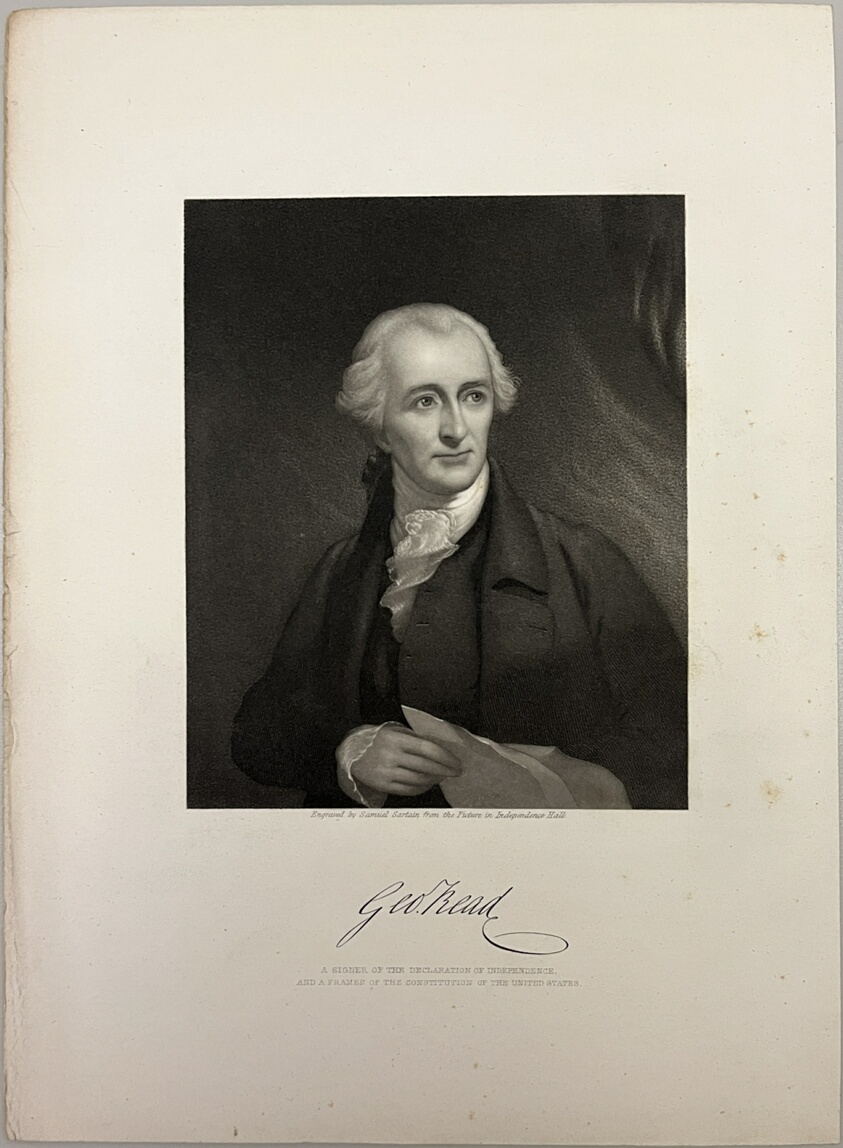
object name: Print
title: George Read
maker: Samuel Sartain (American, 1830-1906); likely after Robert Edge Pine (British, 1742-1788)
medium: Steel engraving and mezzotint on paper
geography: United States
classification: reproduction; print; prints and drawing